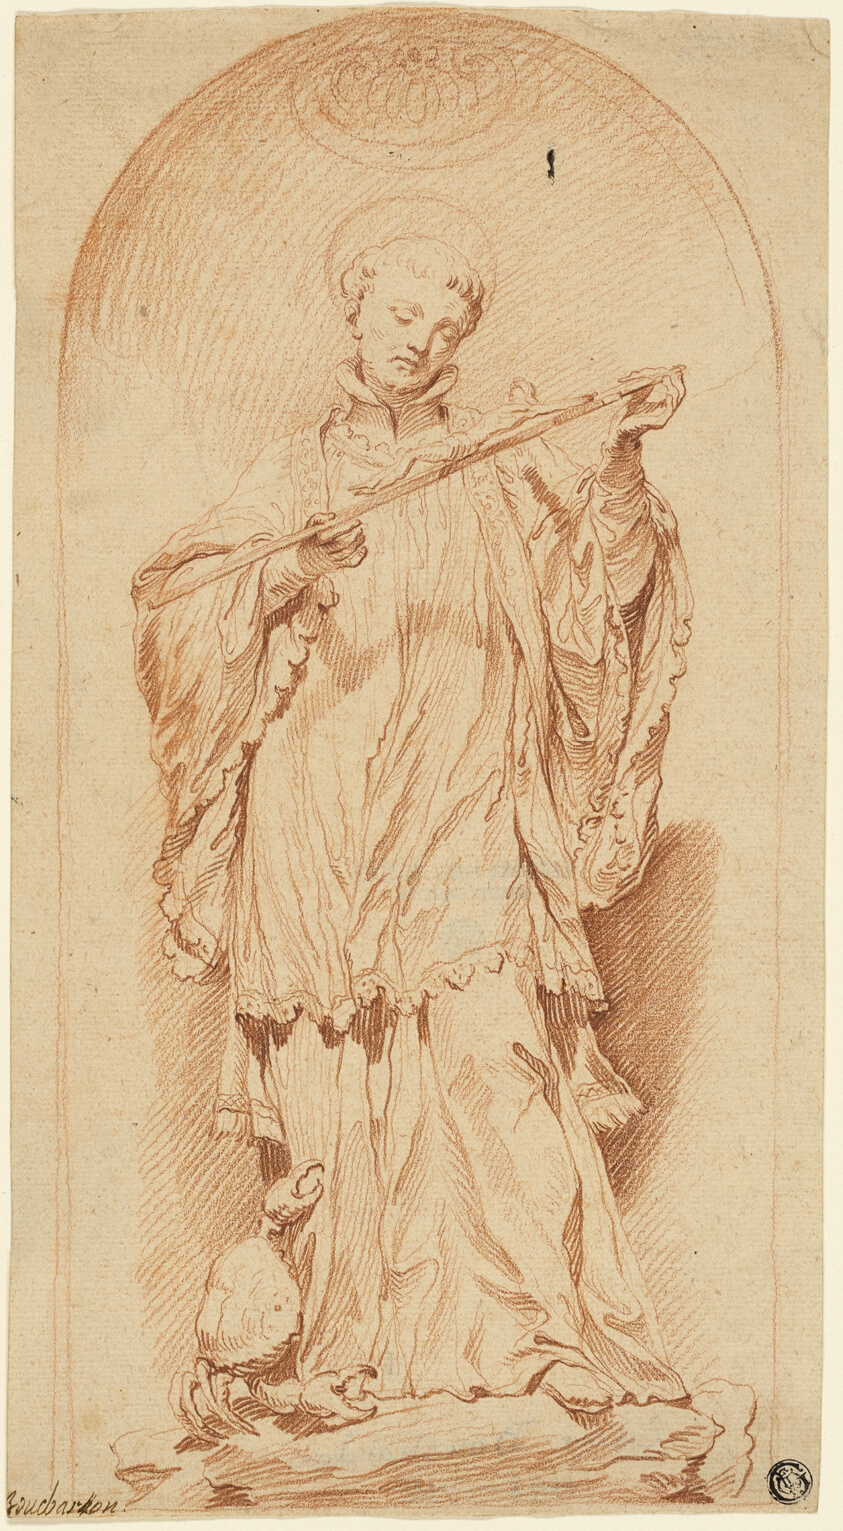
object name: Drawing and Watercolor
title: Saint Francis Holding a Crucifix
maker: Attributed to Edme Bouchardon (French, 1698-1762); after Pierre Legros II (French, 1666-1719)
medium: Red chalk on buff laid paper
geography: France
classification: chalk; drawings (visual works); prints and drawing